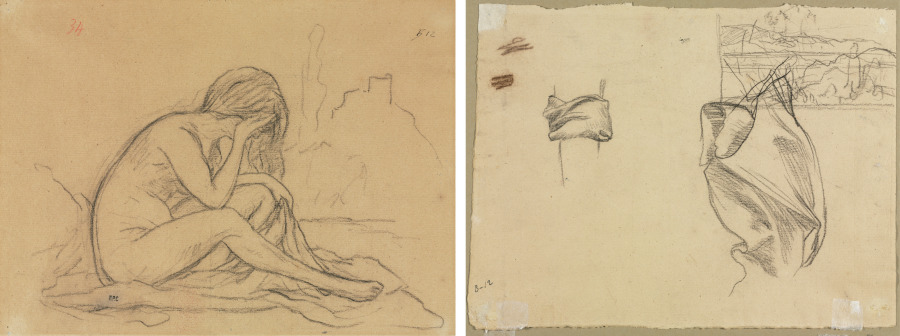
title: Study of a Female Nude (possibly for an unrealized allegorical painting) (recto); Studies of Drapery and Study of a Landscape (verso)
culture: France, 19th century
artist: Pierre Puvis de Chavannes (French, 1824–1898)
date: 1800s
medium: black chalk stumped with heightening of white chalk on brown paper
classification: Drawing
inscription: inscribed upper left center in red pencil: 34; inscribed upper right in black ink: B12